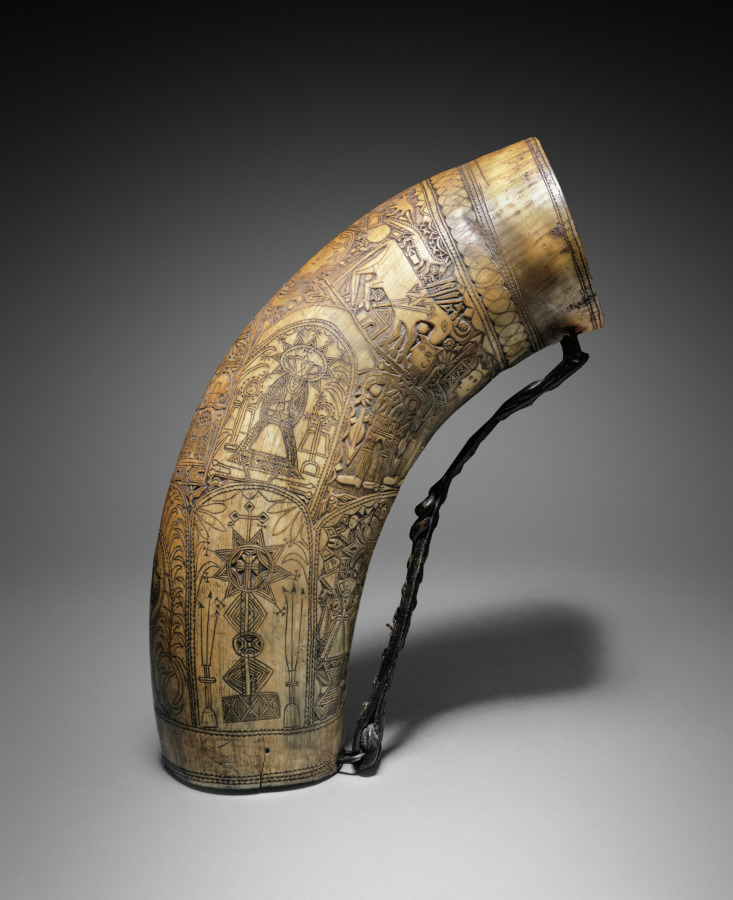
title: Powder Flask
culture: Spain, late 18th-early 19th century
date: late 1700s–early 1800s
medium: cowhorn, incised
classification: Arms and Armor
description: Powder flasks are small, portable containers designed to hold gunpowder. From the 1400s to the 1800s, powder flasks were indispensable for charging and priming firearms of all types. Without powder flasks firearms were of little use to their owners. Many highly decorated flasks rank as works of art.